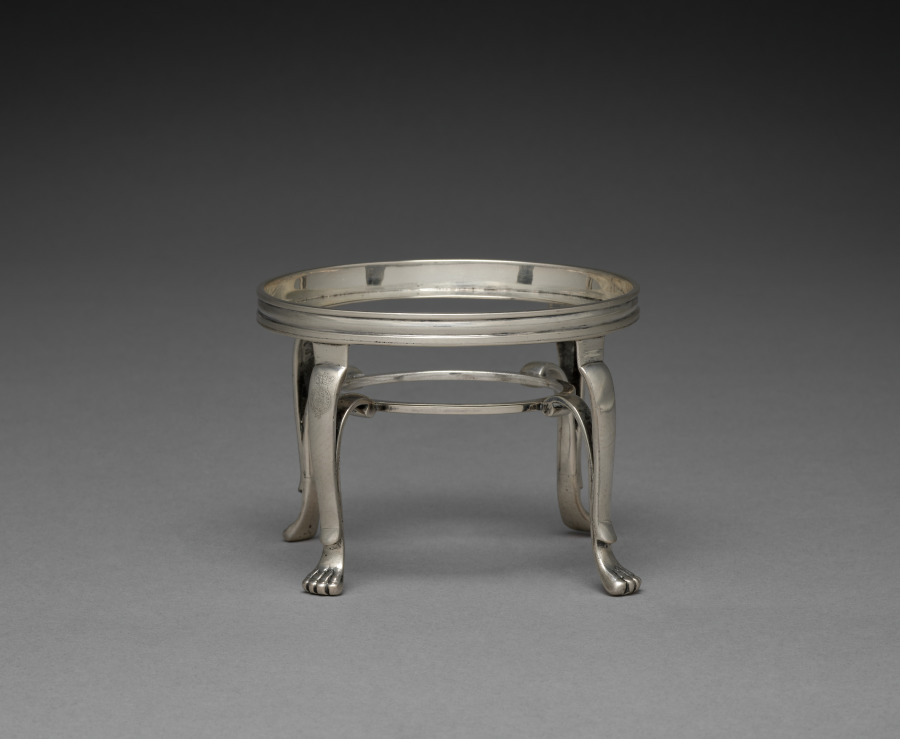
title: Stand for a Hot Water Jug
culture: England, early 19th century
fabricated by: John (British) Edwards (British)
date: 1800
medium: silver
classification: Silver